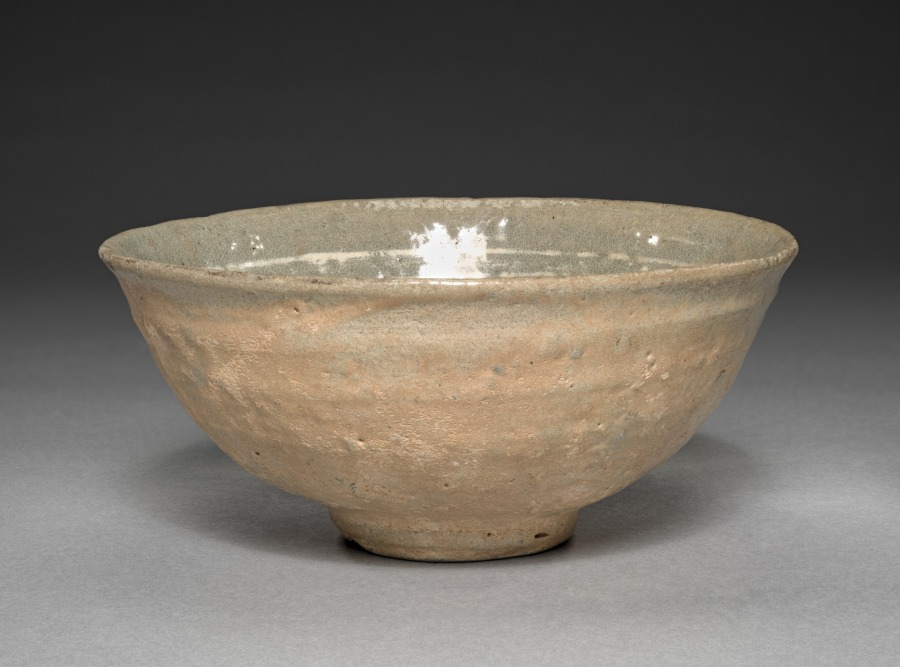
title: Bowl with White-slip Decorations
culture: Korea, Joseon dynasty (1392–1910)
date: 1600s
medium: glazed ceramic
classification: Ceramic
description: This type of wide-mouthed bowl was used every day in Korea, not exclusively for tea drinking. But when it was introduced to Japan around the early 1500s its imperfect appearance evoking the aesthetics of wabi-sabi caused it to be repurposed as a tea bowl. Korean tea bowls were circulated as a item of foreign luxury among Japanese military elites. It's highly possibly this type of bowl was produced in one of the kilns operated by the trading office Busan in Southern Gyeongsang province, and exported to Japan.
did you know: This type of rustic tea bowl was highly appreciated among advanced Japanese practitioners of the tea ceremony.